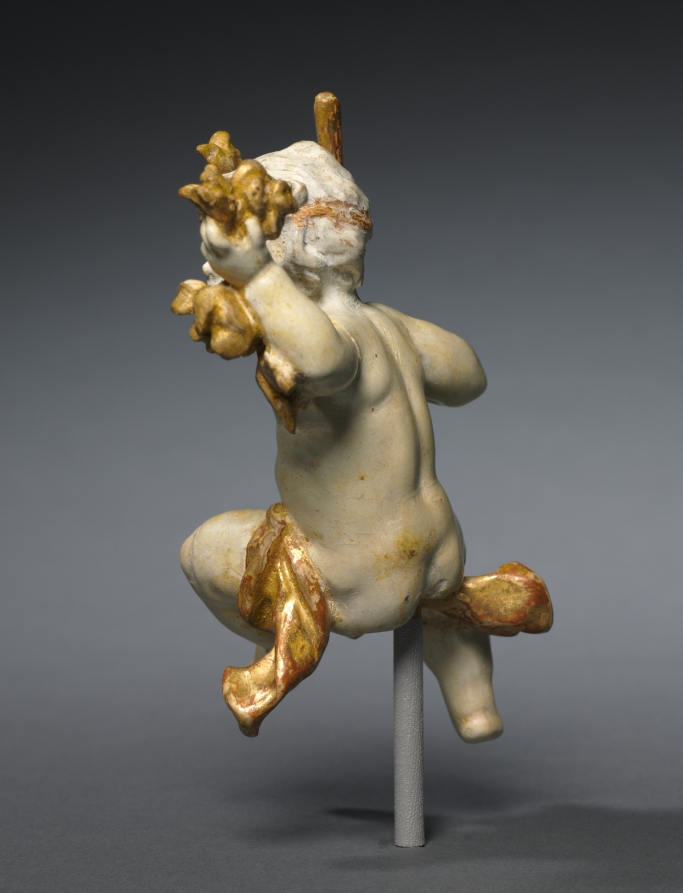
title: Putto as Spring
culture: Germany, 18th century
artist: Ferdinand Tietz (Austrian, 1708–1777)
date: c. 1765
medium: painted and gilded wood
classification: Sculpture